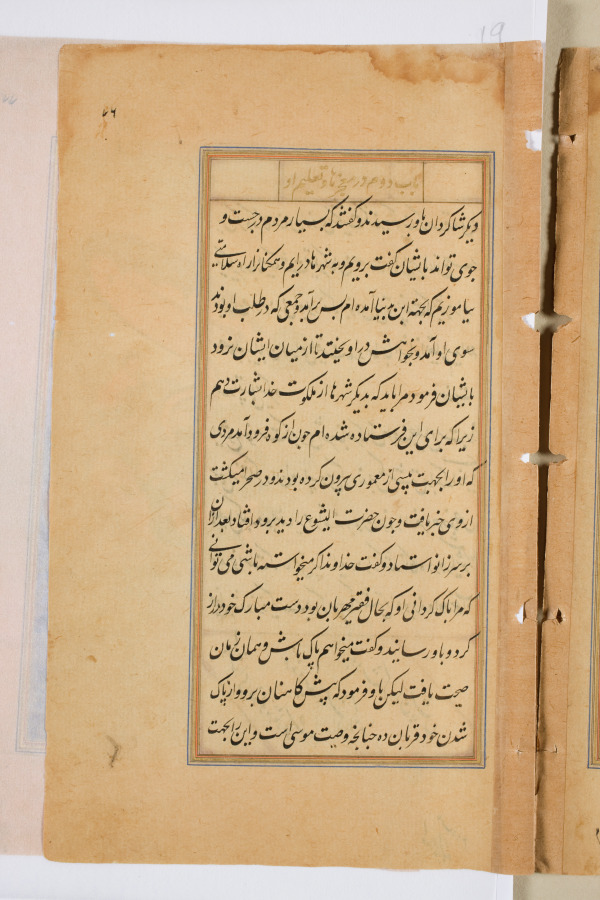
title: Text page from a Mirror of Holiness (Mir’at al-quds) of Father Jerome Xavier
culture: Mughal India, Allahabad, made for Prince Salim (1569–1627)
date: 1602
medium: Ink and gold on paper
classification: Manuscript